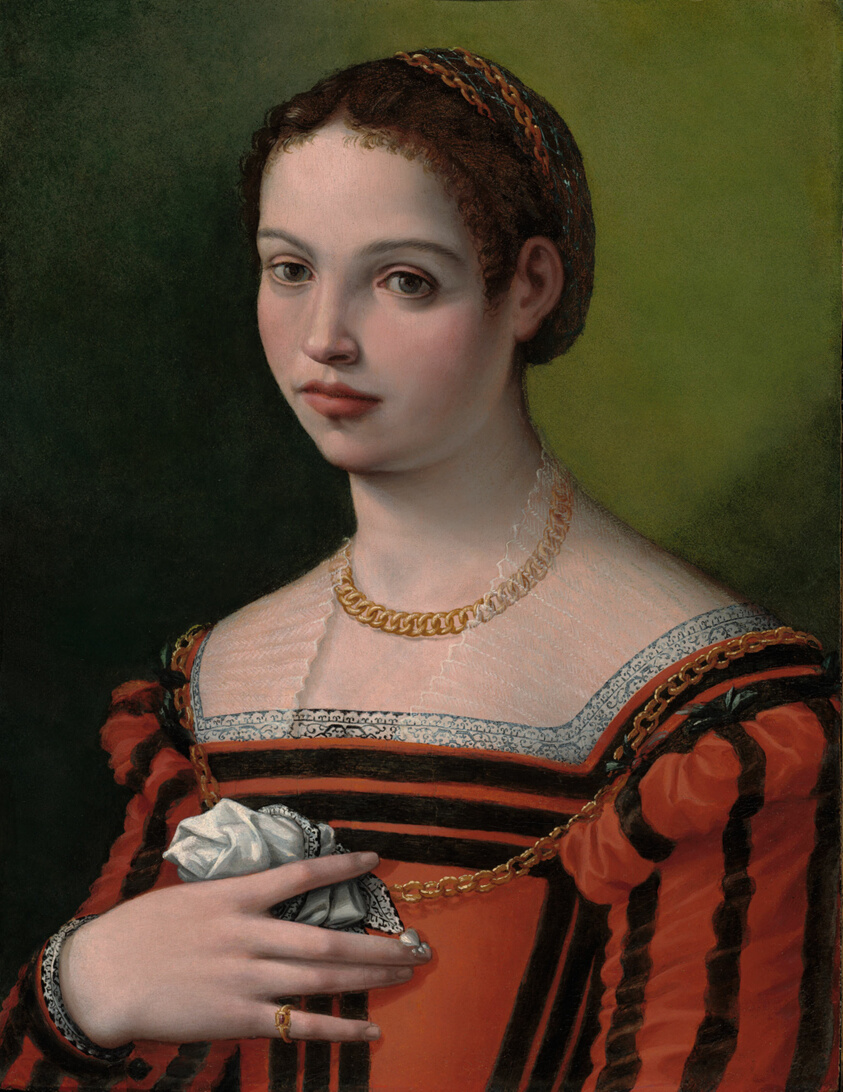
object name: Painting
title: Portrait of a Lady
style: sixteenth century, 16th Century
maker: Michele Tosini (Michele di Ridolfo; Italian, 1503–1577)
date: 1550/60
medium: Oil on panel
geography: Italy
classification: oil on panel; portrait; paint; oil paintings (visual works); Italian; painting; european painting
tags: portraits: female subject, woman, wealth, red (color), portraits, portrait, necklace, luxury, lace, jewelry, green (color), Century of Progress, world's fairs, Chicago World's Fairs